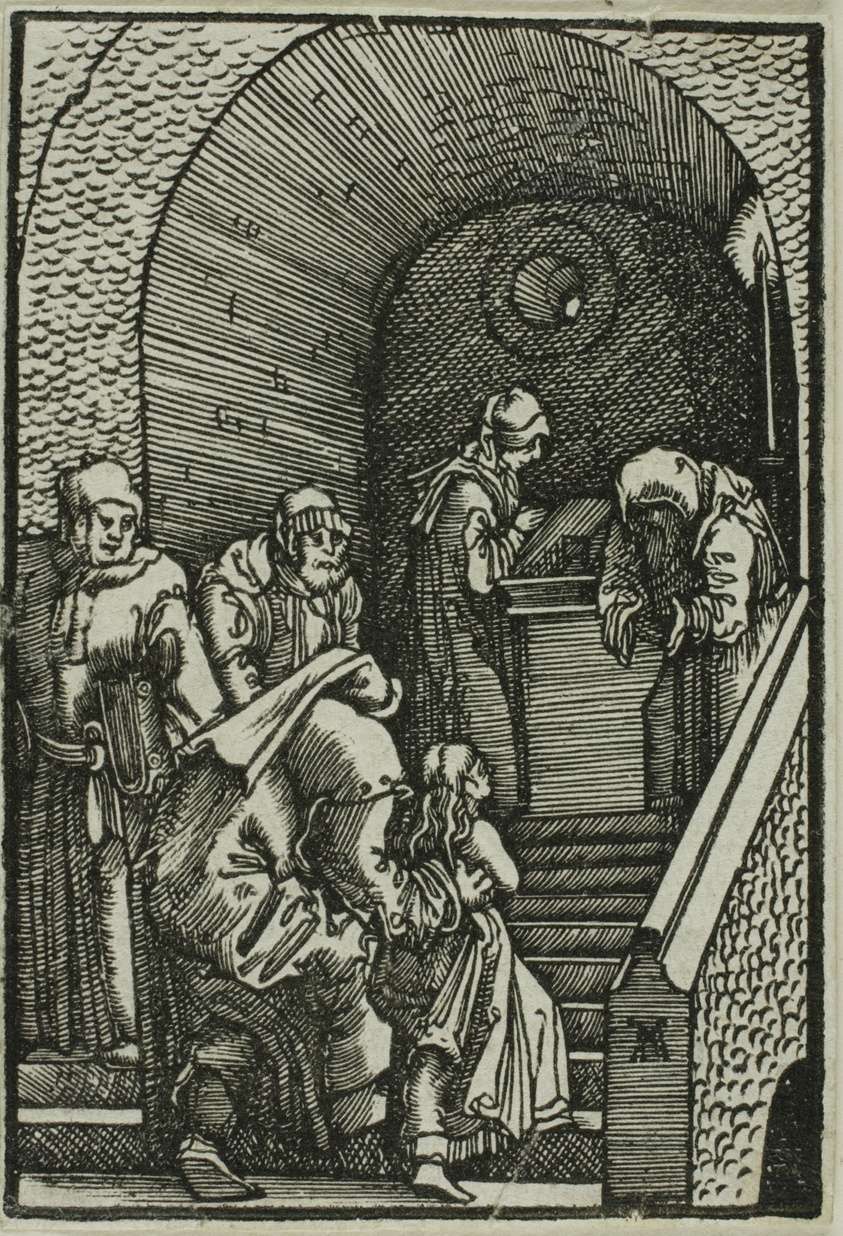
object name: Print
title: Presentation of the Virgin, from The Fall and Redemption of Man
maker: Albrecht Altdorfer (German, c.1480-1538)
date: 1513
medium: Woodcut in black on ivory laid paper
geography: Germany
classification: wood engraving; print; prints and drawing